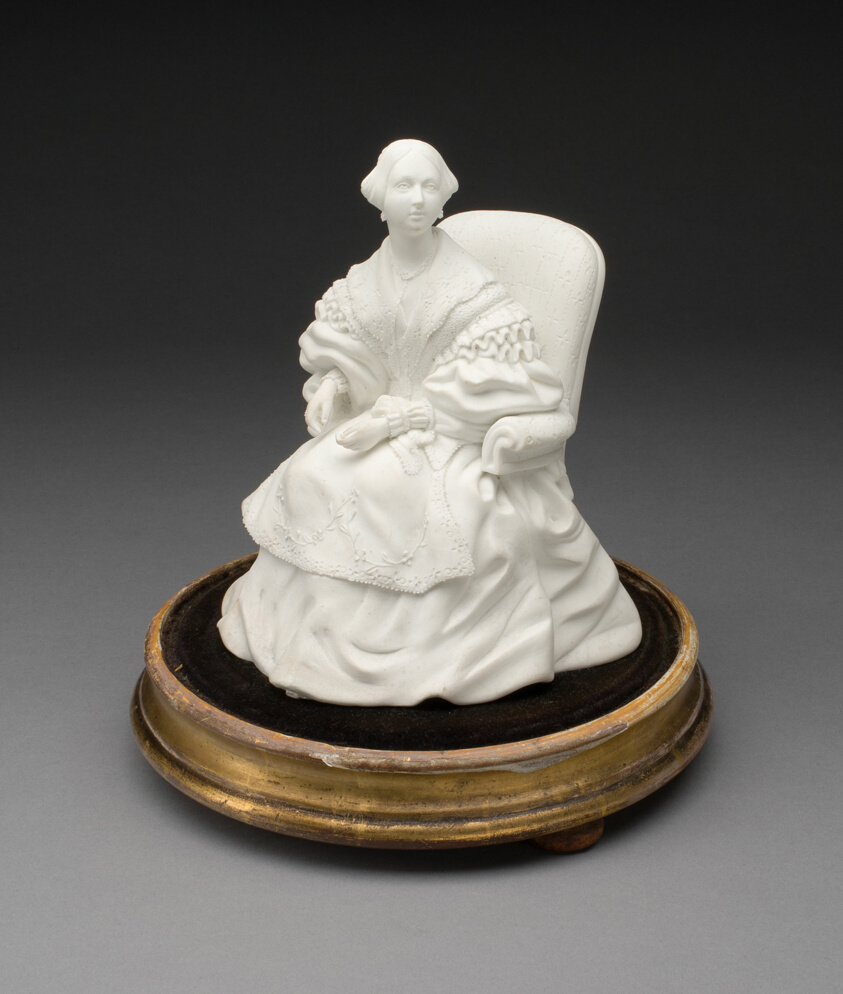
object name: Ceramics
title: Queen Victoria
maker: George Cocker; The Chenies Street Biscuit Porcelain Manufactory; English, 1794-1868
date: 1840–1853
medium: Biscuit porcelain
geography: London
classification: porcelain; european decorative arts; ceramics